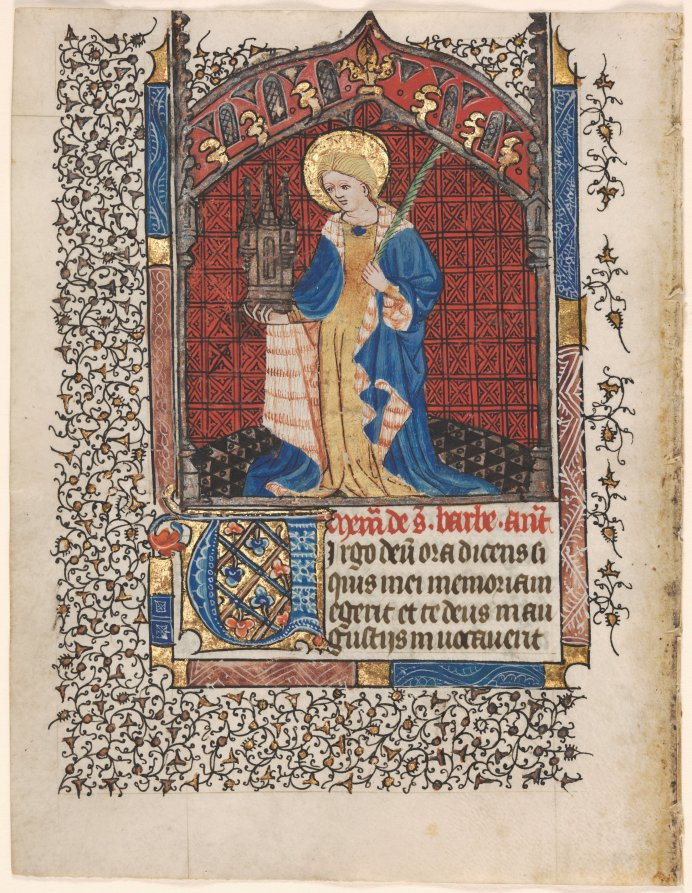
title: Leaf from a Book of Hours: St. Barbara (6 of 6 Excised Leaves)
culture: France, Metz, 15th century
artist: Henri d'Orquevaulx (French)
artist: or Workshop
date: c. 1420–30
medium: ink, tempera, silver, and gold on vellum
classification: Manuscript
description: This leaf survives from what must have been an extraordinarily rich book of hours. The elaborate Passion cycle and Suffrages point to an important commission. Evidence within the calendar and texts suggests that Metz was probably the place of production. Situated on the Moselle River, Metz was the cultural and commercial capital of Lorraine during the 1400s, as well as the location of an important bishopric. It was thus the center of a growing book trade. The illuminations appear to come from the workshop of Henri d'Orquevaulx, a documented Metz manuscript painter. Compositionally, structurally, and stylistically, the miniatures suggest strong links to Netherlandish illumination. Details such as the tub, ewer, towel, and fireplace in the Nativity are typical of the northern love of crowded and unusual compositions, as well as domestic details. It is not known whether d'Orquevaulx came originally from the Netherlands or whether he simply worked or trained there at some point in his career.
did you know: Ranging from lavishly decorated by hand with gold leaf to printed on paper with no images, books of hours were customizable and could be highly personalized to an individual’s tastes, budget, and interests.